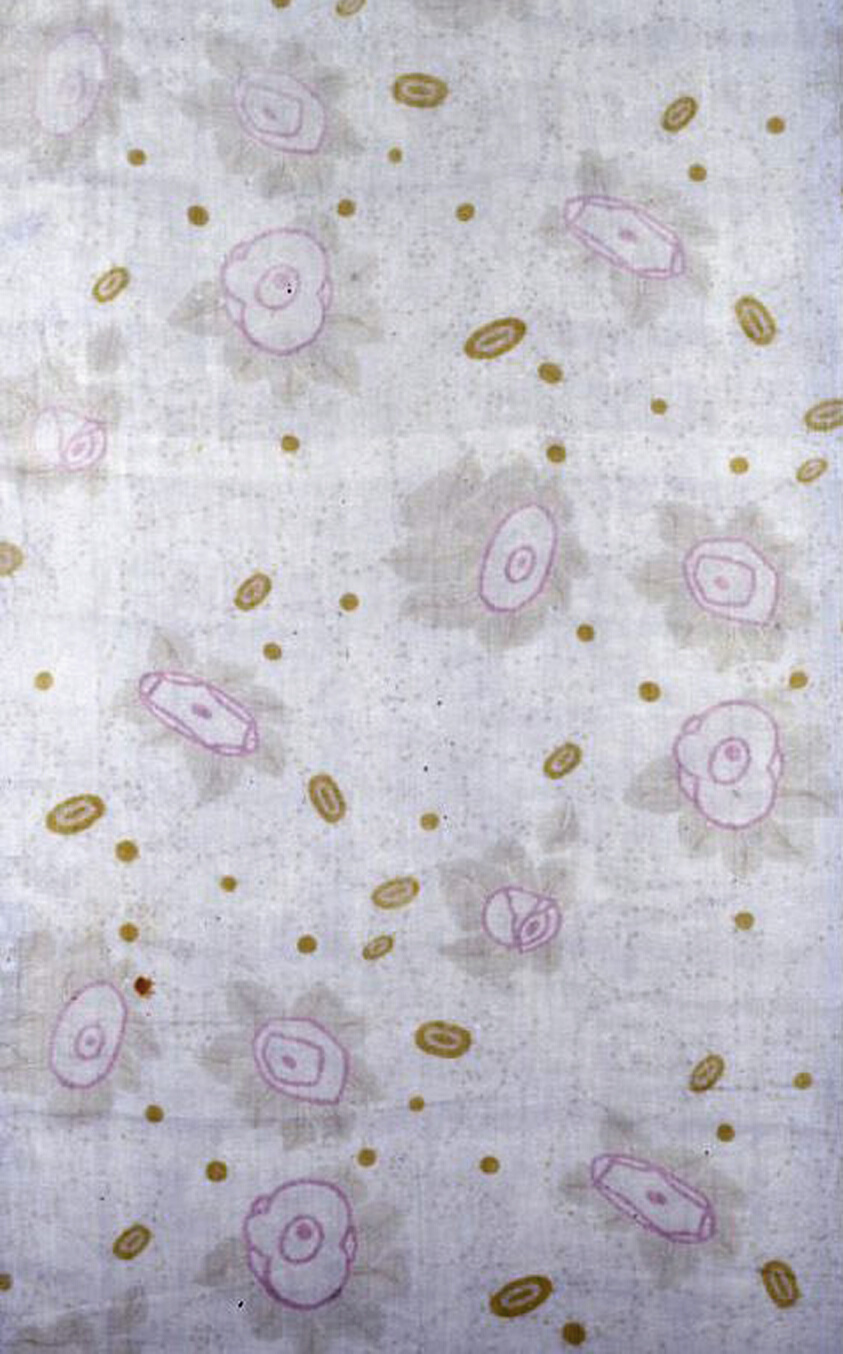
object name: Textile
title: Panel (Dress or Furnishing Fabric)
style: Modernism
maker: Produced by the Wiener Werkstätte (Vienna, active 1903–1932); Austria, Vienna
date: 1903/05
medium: Linen, plain weave; block printed; edged with cotton, plain weave; two widths joined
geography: Vienna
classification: textile; weaving - printed; furnishing textile